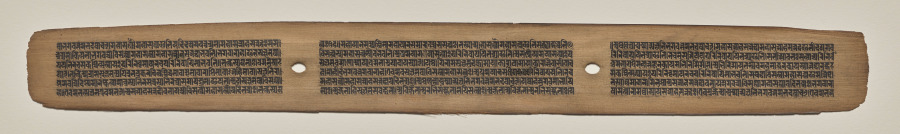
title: Text, Folio 8 (recto), from a Manuscript of the Perfection of Wisdom in Eight Thousand Lines (Ashtasahasrika Prajnaparamita-sutra)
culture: Eastern India, Bihar, Vikramashila Monastery. Painting: Nepal, Kathmandu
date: Sunday, September 14, 1119 (year 239 of the Newar Samvat in the month of Ashvina)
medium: ink on palm leaf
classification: Painting